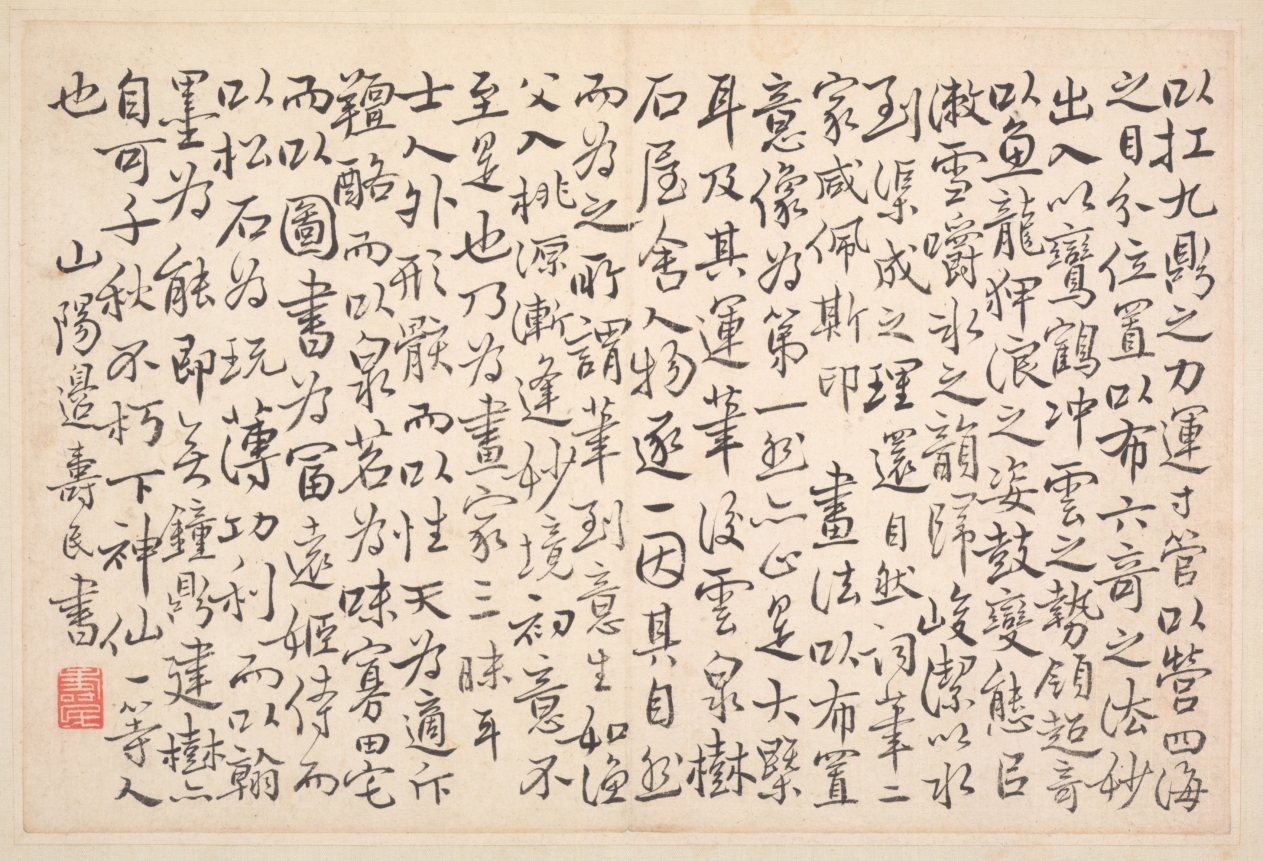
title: Album of Calligraphy and Paintings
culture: China, Qing dynasty (1644-1911)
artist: Bian Shoumin (Chinese, 1684–1752)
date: first half of the 1700s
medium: album leaf; ink and color on paper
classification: Painting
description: The artist Bian Shoumin is known for his depiction of wild geese, water, and reeds. The migrant birds in autumn and winter evoked, in the minds of the Chinese intelligentsia, a time of parting and sorrow.